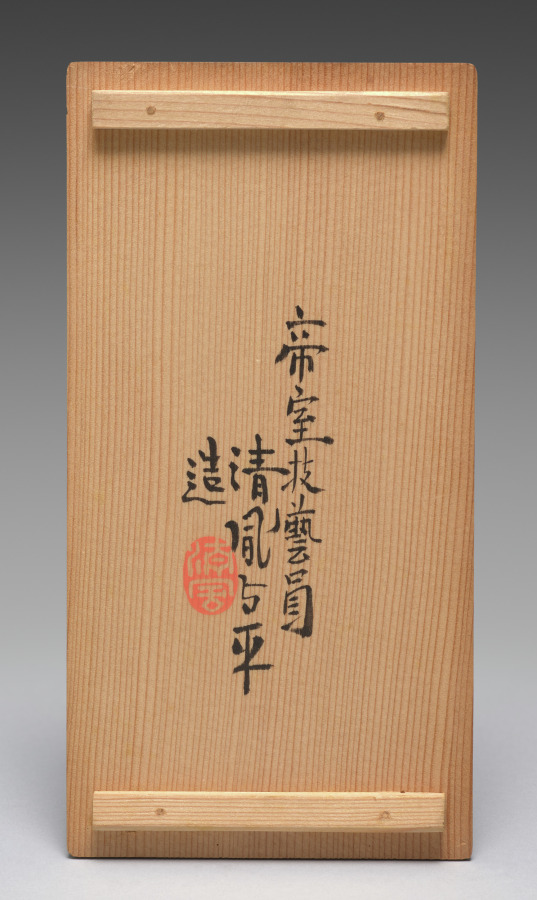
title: Saucers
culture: Japan, Meiji period (1868–1912)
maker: Seifū Yohei III (Japanese, 1851–1914)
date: 1893–1914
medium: Set of ten saucers; porcelain with green glaze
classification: Ceramic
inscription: 清風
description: Yohei III’s main output for his sophisticated clientele was in the form of tea sets and dining sets. He created a range of dishes in green glazes. He often produced in pairs, sets of five, or sets of ten. For this set of ten small dishes in a simple, round form that emphasizes the glaze above all, the box lid designates the piece as seiji, or green-glazed porcelain, using a general term for the extensive palette of green glazes often called celadon in English. The box lid further identifies the dishes themselves as tōchō, literally “bean-sized saucers,” a size that makes them suitable for dipping sauces.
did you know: The ten dishes in this set are stored in stacks of five in a two-compartment box.